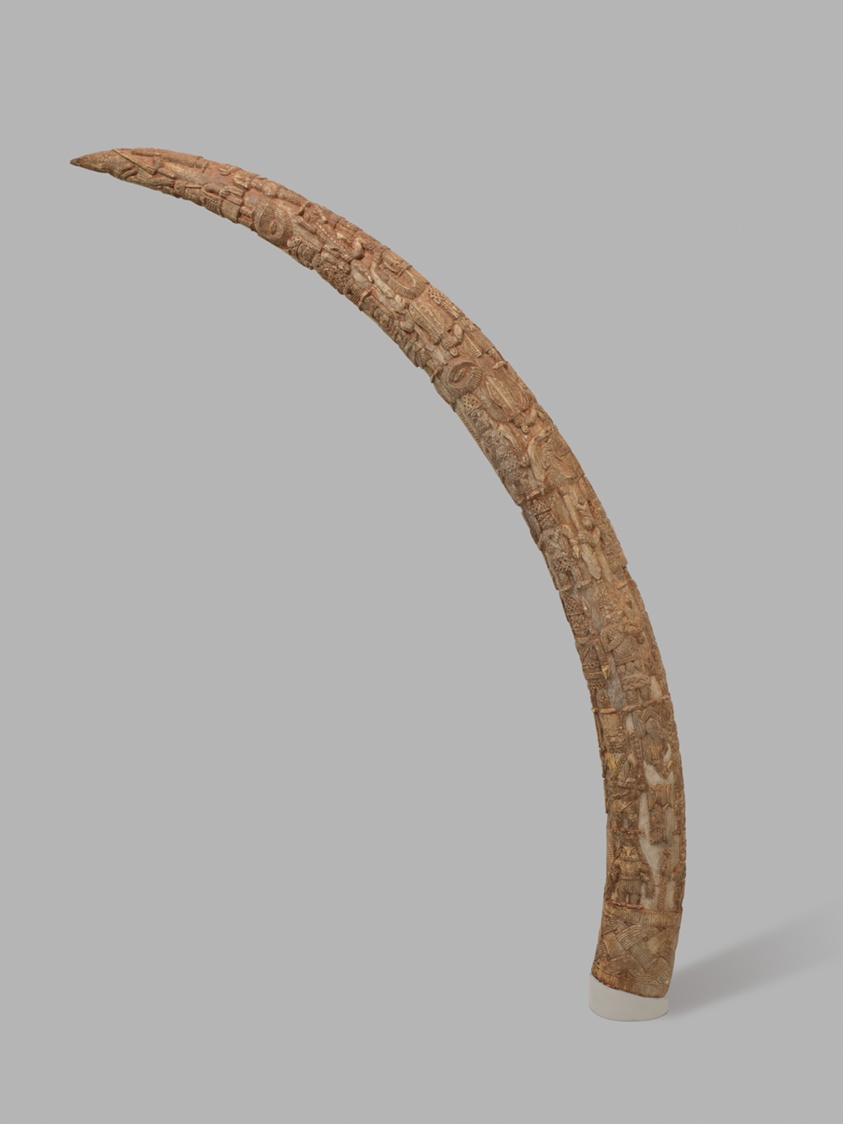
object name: Religious/Ritual Object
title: Tusk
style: edo (african), Arts of Africa, Coastal West Africa, african Art, benin kingdom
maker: Edo, Kingdom of Benin; Nigeria; Coastal West Africa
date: 1850-1888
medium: Ivory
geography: Nigeria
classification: ceremonial object; ivory; arts of Africa; african art; ritual objects; altar object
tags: kingship, sacred, supernatural, altar, ancestors, divine rulership, king, royalty